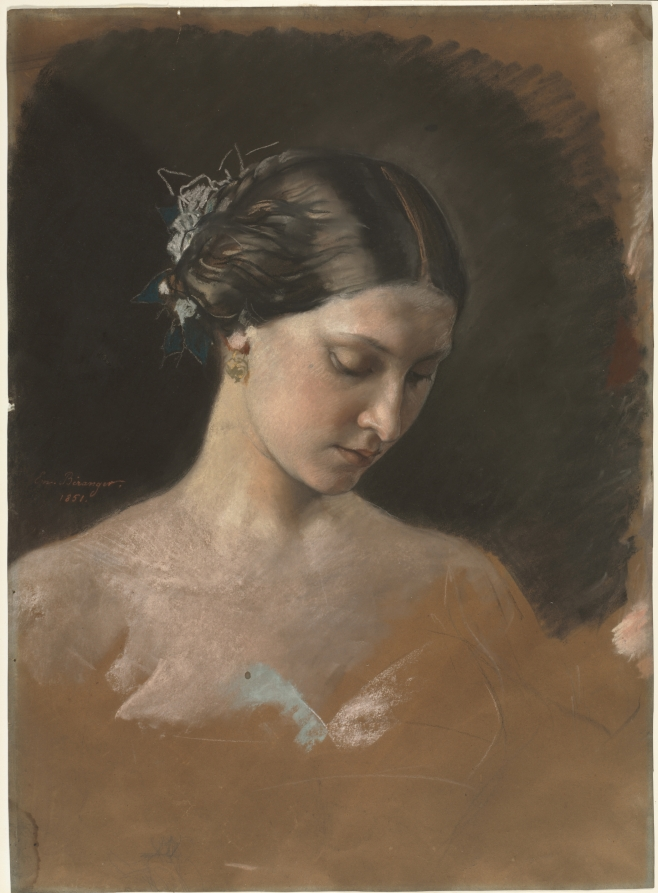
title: Portrait of a Woman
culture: France, 19th century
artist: Jean-Baptiste-Antoine-Emile Béranger (French, 1814–1883)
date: c. 1889–1899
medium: pastel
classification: Drawing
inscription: inscribed in orange pastel, center left: "Em. Béranger./ 1851"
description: Béranger is known as an academic painter of genre subjects. This pastel study of a young woman with downcast eyes conveys a sense of vitality and immediacy lacking in his more highly finished works in oil. While the graceful features of her face are articulated with tender detail, the flowers adorning her hair are summarily indicated with a handful of rapid strokes, and her bodice is barely suggested.